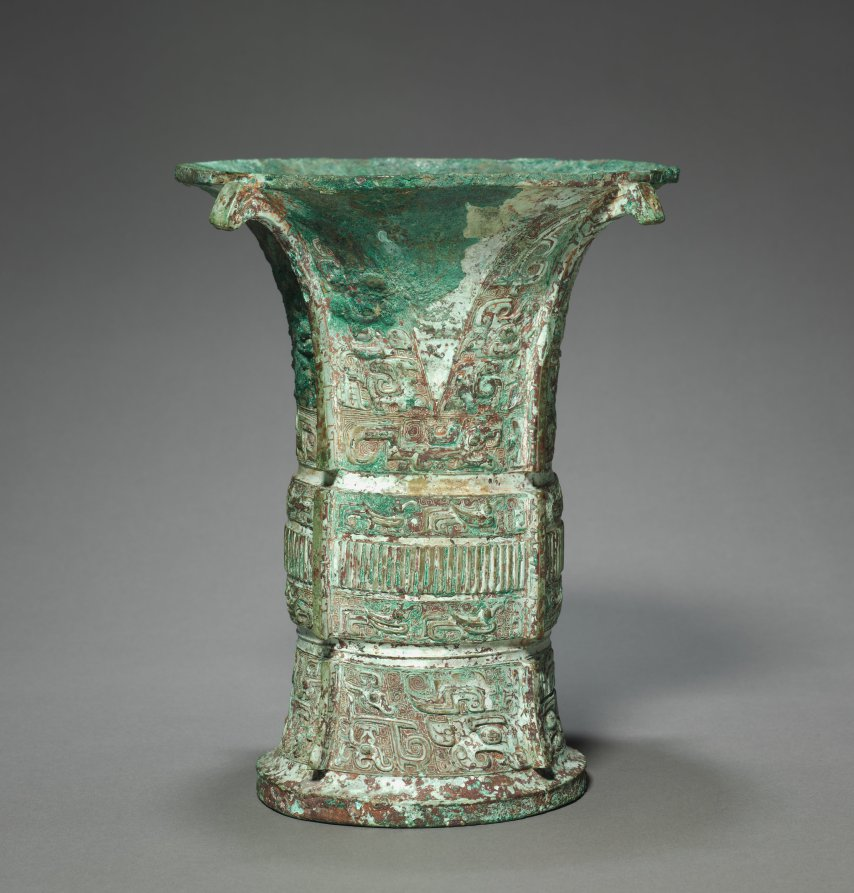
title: Wine Vessel (Fu Wu Zun)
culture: China, Western Zhou dynasty (c. 1046–771 BCE)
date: c. 1000–900 BCE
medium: bronze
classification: Metalwork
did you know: This vessel is decorated with dragons and taotie, a stylized monster face motif frequently found on ancient Chinese ritual bronzes.